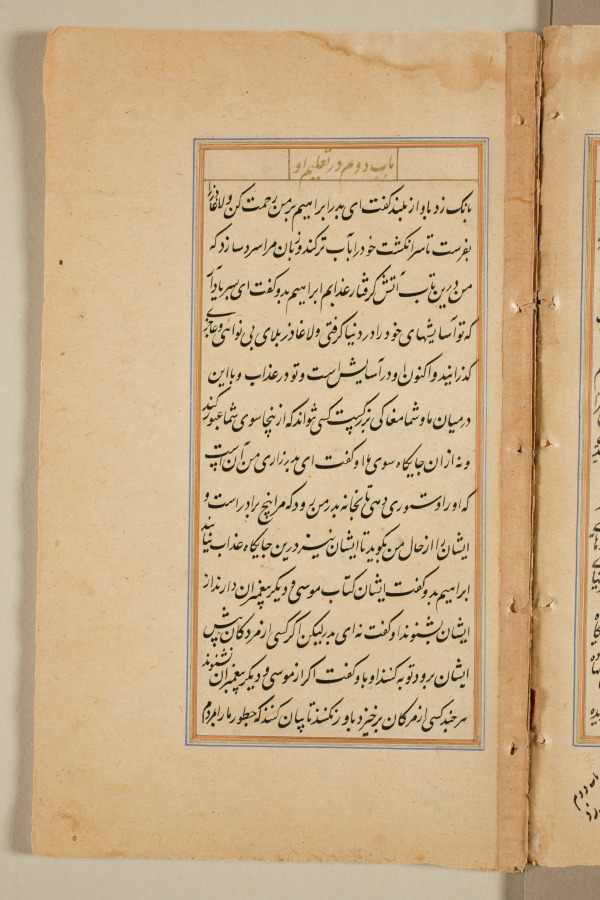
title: Text page from a Mirror of Holiness (Mir’at al-quds) of Father Jerome Xavier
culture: Mughal India, Allahabad, made for Prince Salim (1569–1627)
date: 1602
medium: Ink and gold on paper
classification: Manuscript